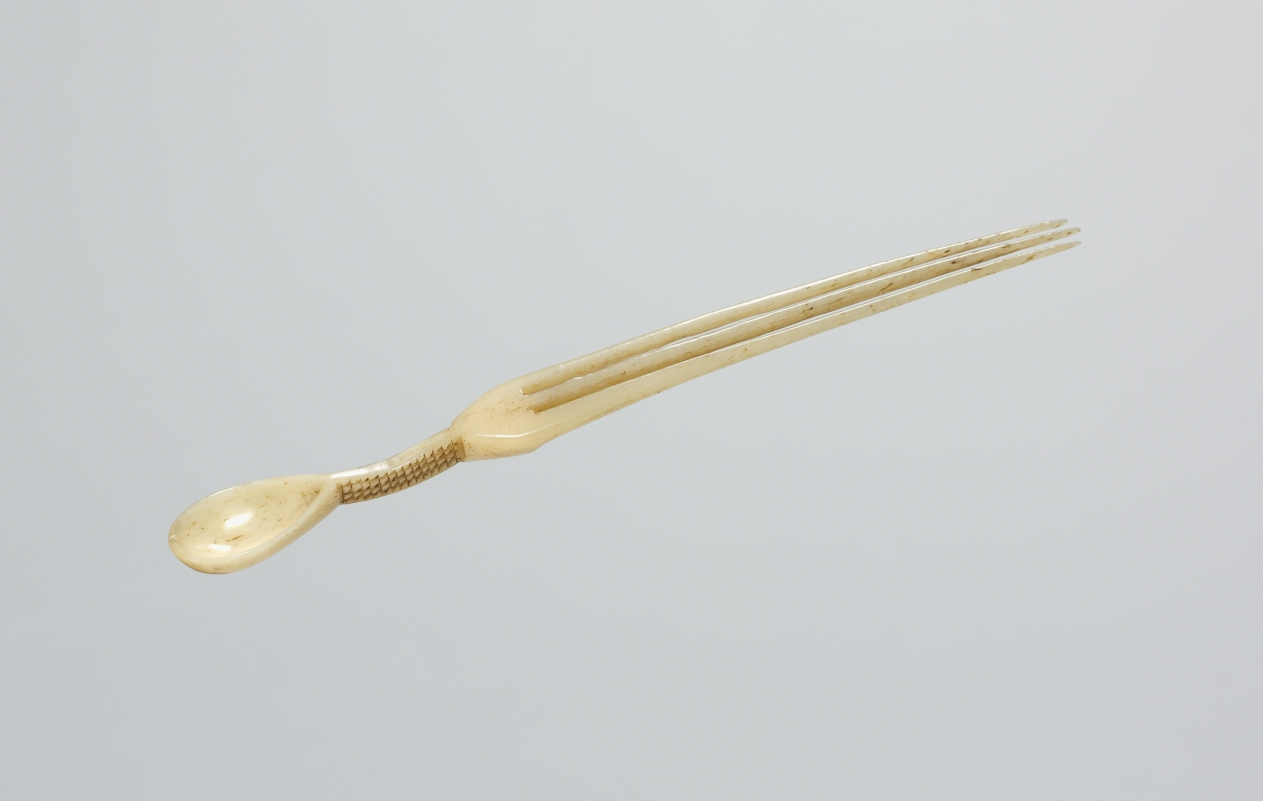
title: Snuff Spoon/Comb (intshengula or izintshengula)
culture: Africa, Southern Africa, South Africa, Zulu-style maker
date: late 1800s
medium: Bone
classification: Sculpture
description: Often, snuff spoons made from the rib of an ox or cow were subtly carved to suggest a female body. Decorated with incised designs blackened with cattle fat and ash, many are true hybrid objects, combining a spoon with a long-tined comb or hairpin. Such spoons were typically worn as ornaments in the hair or even the beard, thus signaling the social standing of their wearer.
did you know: Such spoons were typically worn as ornaments in the hair or even the beard, signaling the social standing of their wearer.